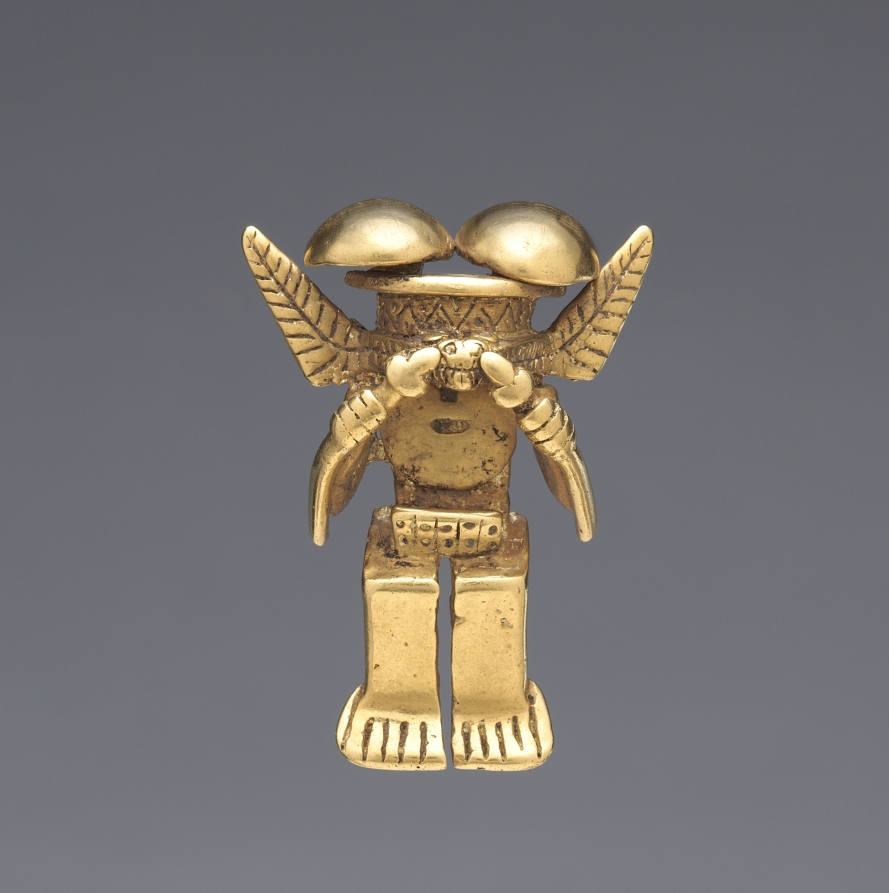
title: Animal-Headed Figure Pendant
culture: Colombia, Quimbaya or Yotoco style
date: 1–800 CE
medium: cast gold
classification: Metalwork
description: The same creature, with a human body but the head of an animal, appears in both pendants. It holds batons to its mouth, and whiskers or ears flare from the sides of the head. The headdress domes are mystifying; they have been described as mushrooms or gourds, among other things.